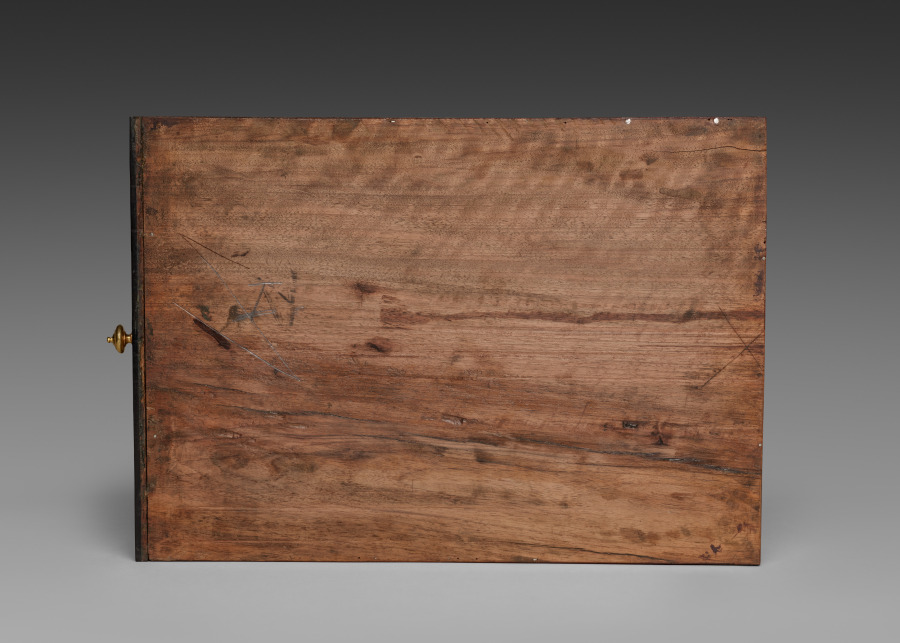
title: Interior Drawer for Cabinet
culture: France, late 17th Century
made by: André-Charles Boulle (French, 1642–1732)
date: c. 1690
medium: ebony, marquetry in metal and tortoise shell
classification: Furniture and woodwork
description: Appointed cabinetmaker to King Louis XIV in 1672, André-Charles Boulle became a master of furniture making in France during the late 1600s until his death in 1732. Known primarily for his use of marquetry, in which metal patterns are inlaid into tortoiseshell then applied within the veneered surface of the furniture, Boulle established a level of quality and craftsmanship few others could achieve. As a result, his work found favor at the royal court and among other aristocrats and diplomats eager to impress the king. The inclusion of a medallion depicting Louis XIV within the bronze decoration of this chest would have identified the owner with the royal court. Often exhibiting stout architectural proportions with elegant groups of inlaid motifs such as the parrot on the central panel of this chest, Boulle’s designs are an example of the intellectual fashion for contrasting ideas, materials, and motifs.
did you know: Originally designed to sit atop an elaborate tall stand, this chest was likely altered in the late 1700s to reduce its scale and height.